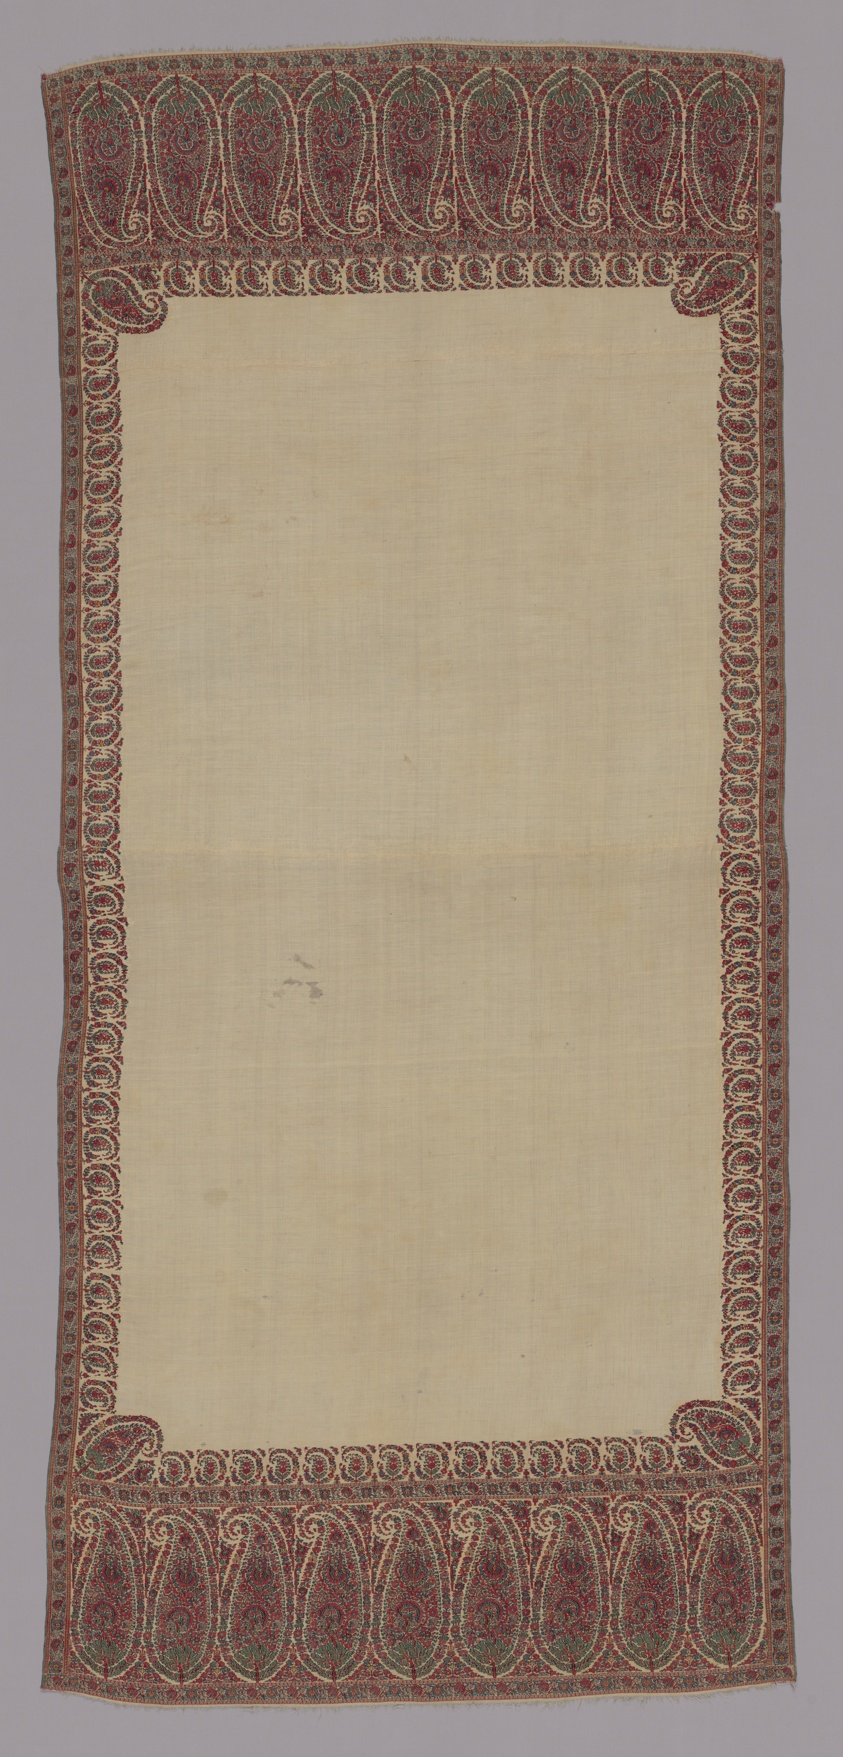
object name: Costume and Accessories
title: Palledar (Long Shawl)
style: 19th century, kashmiri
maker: Kashmir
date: 1815-25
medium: Wool; center, twill; ends and border, double interlocking twill tapestry weave; main warp fringe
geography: Kashmir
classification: textile; weaving; garment; costume; costume - weaving; costume accessory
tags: paisley, flowers, floral motifs